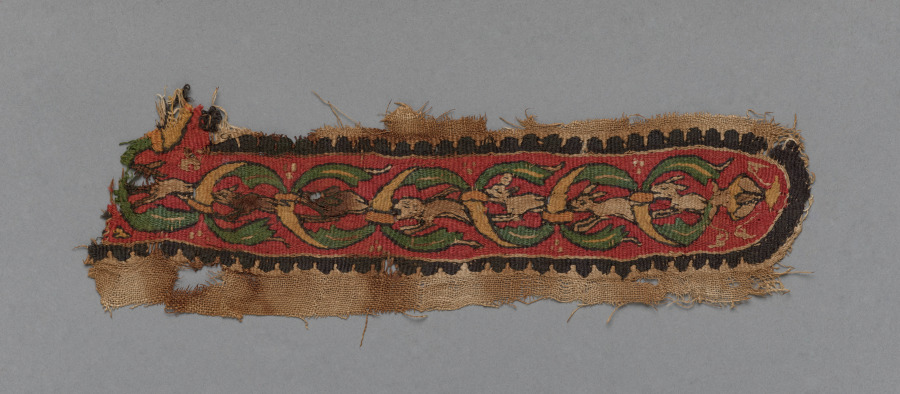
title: Fragment from a Tunic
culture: Egypt, 6th - 16th century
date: 500s - 1500s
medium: tabby weave with inwoven tapestry ornament, linen and wool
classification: Textile